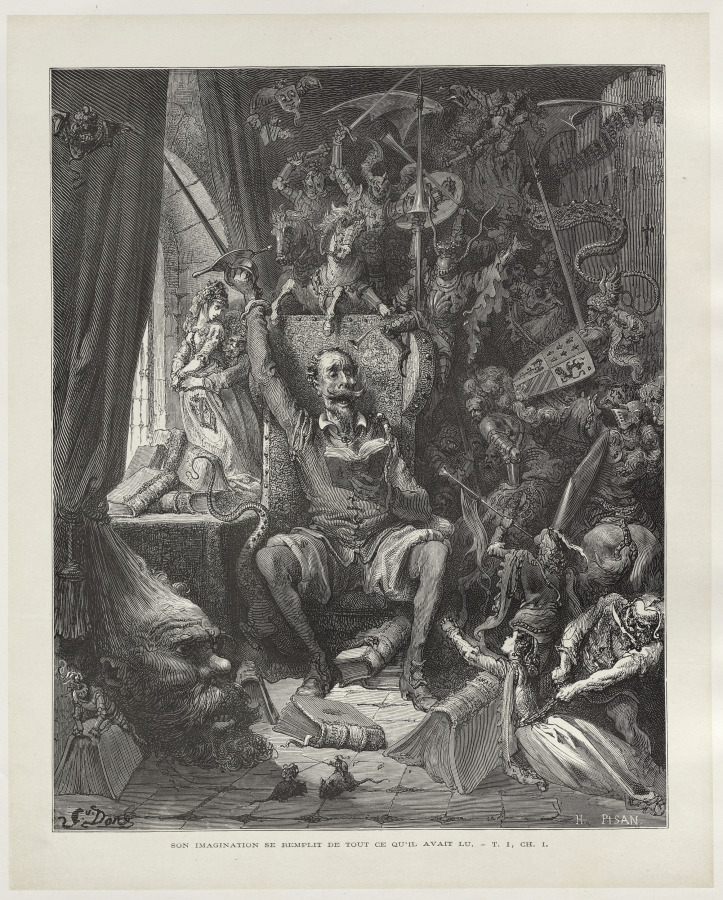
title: Don Quixote (vol I)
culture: France, 19th century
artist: Héliodore Pisan (French, 1822–1890)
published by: Hachette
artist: after Gustave Doré (French, 1832–1883)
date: 1863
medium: wood engraving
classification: Bound Volume